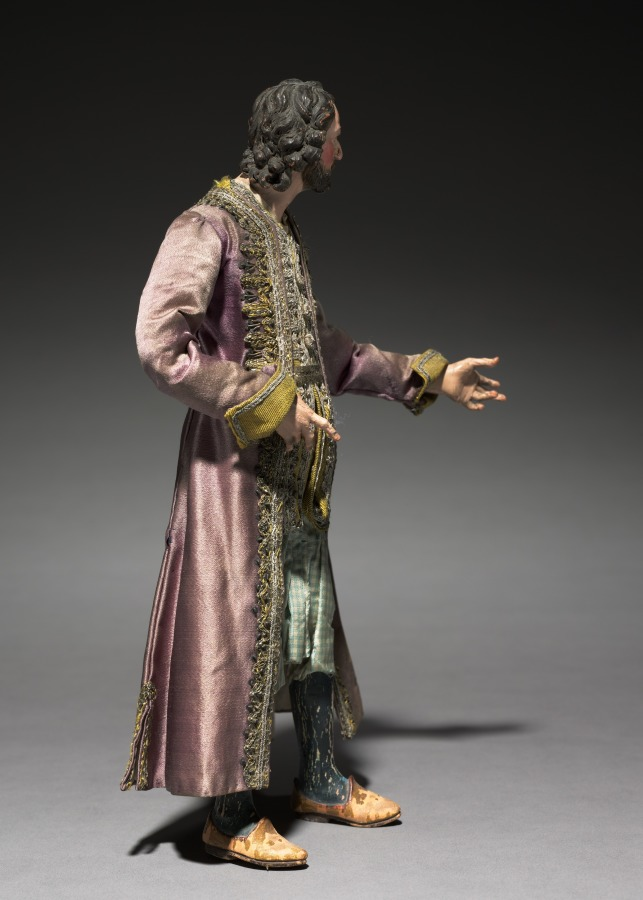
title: Figure from a Crèche: Standing Man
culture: Italy, Naples, late 18th-early 19th century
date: 1780–1830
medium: painted wood and terracotta with various textiles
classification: Sculpture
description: The practice of creating scenes of the Nativity for the home dates from the early 1700s in Italy, where people began to set up doll-like figures of about a foot or less in height. The custom was particularly popular in Naples around 1800, where crèche scenes (crèche means cradle, or crib) included many figures, whose heads and hands of painted terracotta, stuffed cloth bodies, and clothing adapted from contemporary local costumes gave them an amazingly realistic character. Representations of the birth of Jesus can be traced to the first few centuries of Christianity. Both living creatures and sculptural depictions of them were used from early times. By the late middle ages it was customary to create life-size figures of wood or stone, naturalistically painted, to represent the characters who participated in the events of Jesus's early life. These sculptures were then arranged in scenes illustrating one or both of the most important of these events, the Adoration of the Shepherds and the Adoration of the Magi—the three kings from the East who came to pay homage to the Christ child. Used in churches, these large figures were especially popular in Italy, Central Europe, Spain, and Portugal.